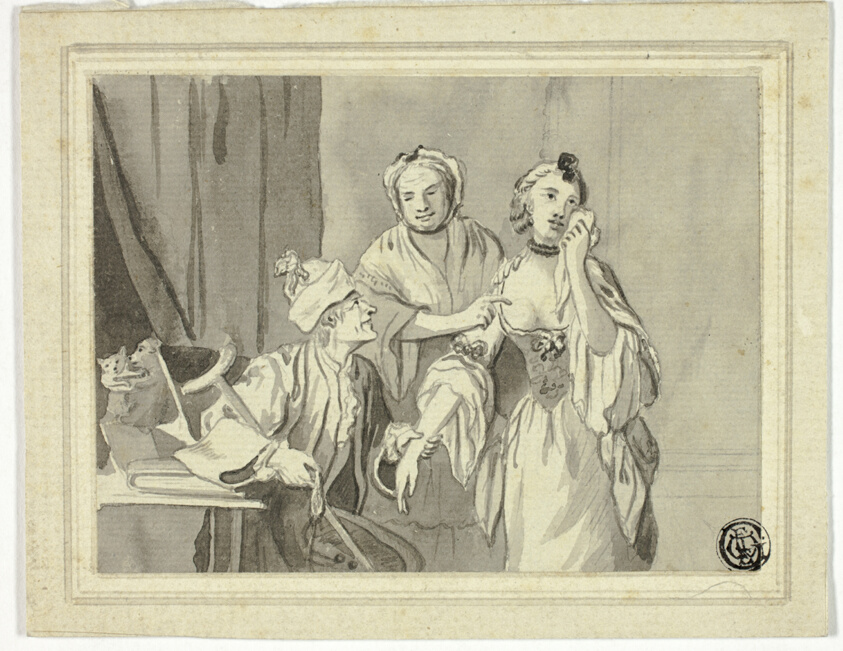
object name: Drawing and Watercolor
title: Literary Illustration: Old Man Detaining Young Woman, Who is Accompanied by Older Woman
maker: John Collet (English, c. 1725-1780); or Jacques Callot (French, 1592-1635)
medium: Brush and black and gray wash, over traces of graphite, on cream laid paper, laid down on cream laid card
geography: France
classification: brush and wash; paper; ink wash; drawings (visual works); prints and drawing